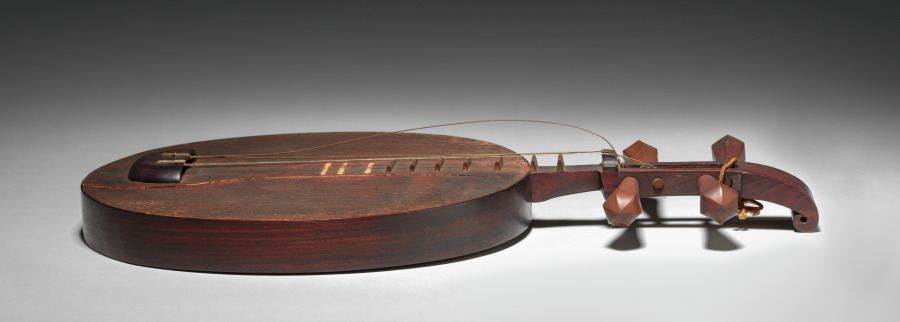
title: Moon Lute (Yueqin)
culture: China, Qing dynasty (1644-1911)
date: 1800s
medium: Rosewood, wutong (paulownia) wood, and gut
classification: Musical Instrument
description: Its resemblance to the full moon (yue 月) gives the yueqin its name. Found in popular ensembles, the Beijing and folk (jingxi) operas and used to accompany song, the yueqin has only recently been embraced by the modern Chinese orchestra. The player presses the strings between the frets making chord playing difficult but giving increased control over the timbre and intonation. Strings are plucked with fingernails or a pick using up-and-down strokes and tremolo techniques that sustain and provide color to a tone. It is known as gekkin in Japan.